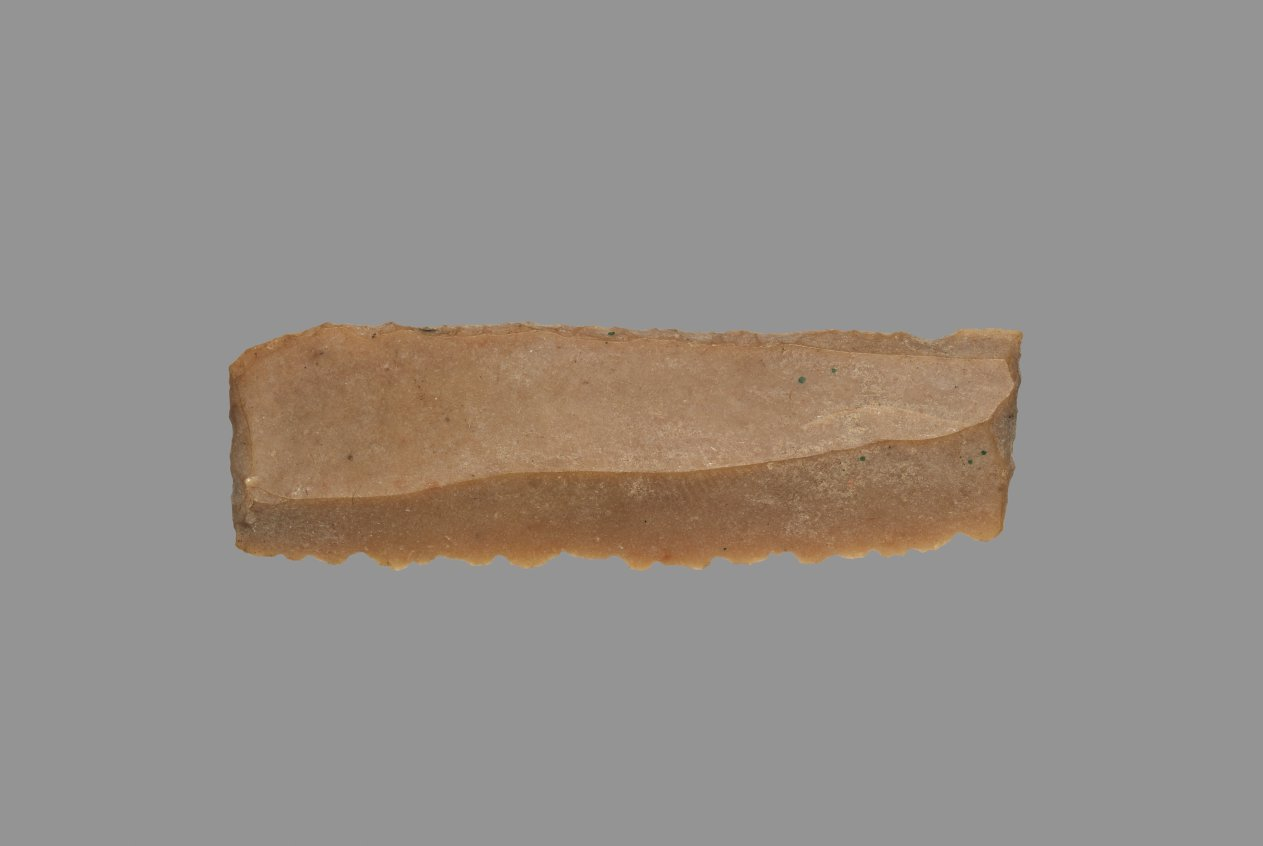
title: Sickle Blade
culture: Egypt, Middle Kingdom (2040–1648 BCE), Dynasty 12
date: 1980–1801 BCE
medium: flint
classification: Implements